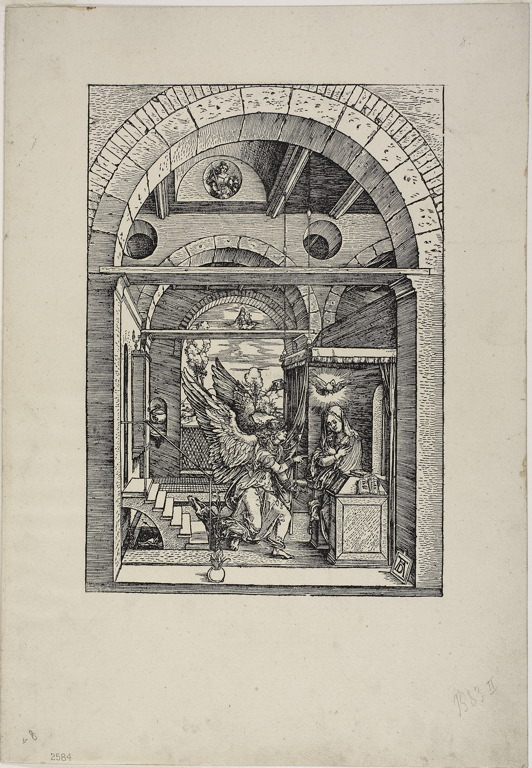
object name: Print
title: The Annunciation, from The Life of the Virgin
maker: Albrecht Dürer (German, 1471-1528)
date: c. 1503, published 1511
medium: Woodcut in black on ivory laid paper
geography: Germany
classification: woodcut; print; prints and drawing; paper